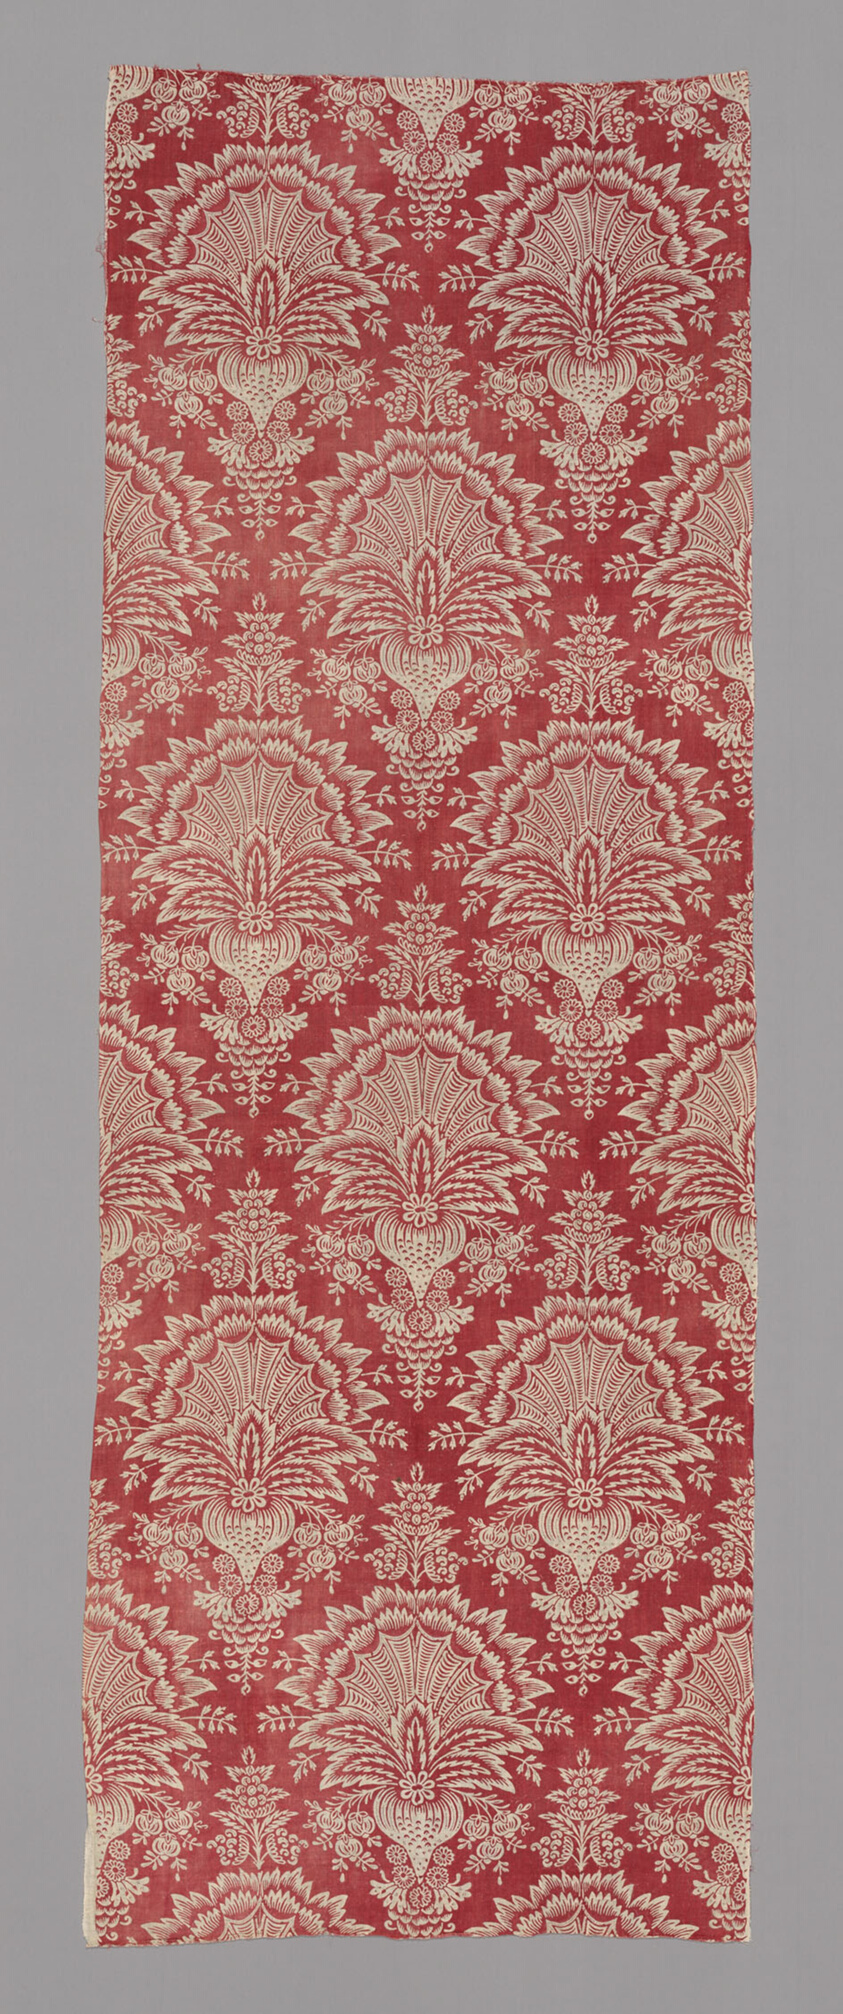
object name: Textile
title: Sixteen Panels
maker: France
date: c. 1830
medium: Cotton, plain weave; block printed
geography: France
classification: textile; weaving - printed; printed textile